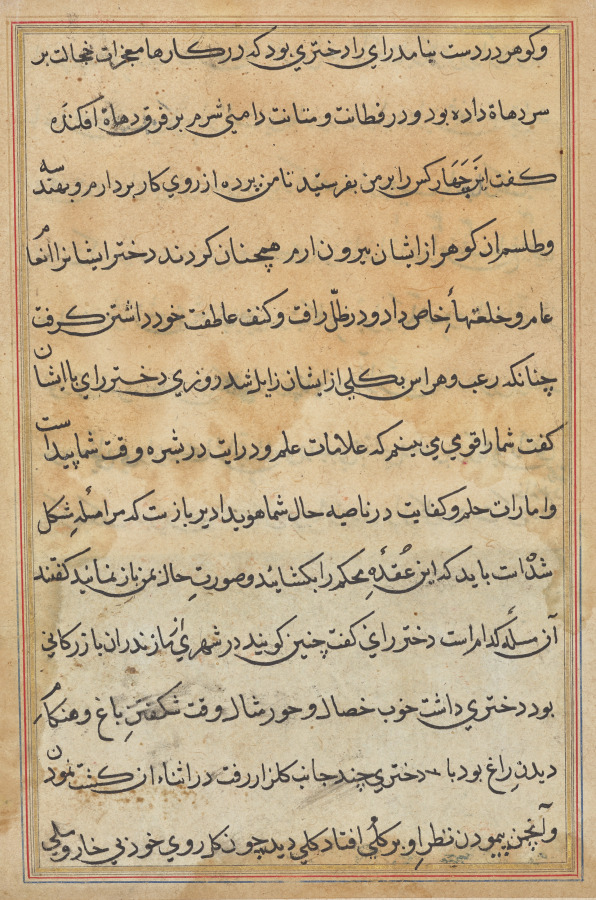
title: Page from Tales of a Parrot (Tuti-nama): text page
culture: Mughal India, court of Akbar (reigned 1556–1605)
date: c. 1560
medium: gum tempera, ink, and gold on paper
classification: Painting